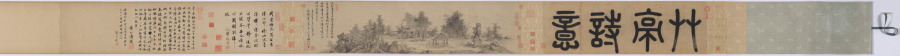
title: Poetic Feeling in a Thatched Pavilion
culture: China, Yuan dynasty (1271-1368)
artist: Wu Zhen (Chinese, 1280–1354)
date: 1347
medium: handscroll; ink on paper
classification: Painting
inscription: 依村構草亭，端方意匠宏。 林深禽鳥樂，塵遠竹松輕。 泉石俱延賞，琴書悅性情。 何當謝凡近，任適慰平生。 至正七年丁亥冬十月，為元澤戲作草亭詩意。梅沙彌書 [印]楳華盦; 嘉興吳鎮仲圭書畫記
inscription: 我愛梅花翁，巨老傳心印。 脩此水墨缘，種種得蒼潤。 樹石墮筆鋒，造化不能吝。 而今橡林下，我願執掃汛。 後學沈周 [印]启南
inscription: Colophon by Chen Rentao (1952): 予求梅道人畫二十年不可得。所見多膺鼎，即故宮所藏山水數軸都不可靠。傳世真迹，惟《漁父圖》、《嘉禾八景》與此《草亭詩意》而已。壬辰十月十四日余大病初愈，居家休養，研山師忽持此圖相贈。展卷披覽，頓覺精神沛振，如服僊藥。同日又得宋拓柳公權《神策軍紀聖德碑》，及群玉堂藏《真草書千(字)文》，皆海內孤本。一日得數寶，欣喜何如，書以志幸。 陳仁濤識 [印]陳氏仁濤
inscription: Colophon by Chen Rentao: 此圖作於至正七年丁亥，時年六十八，盖其晚年神品也。 濤又識 [印]陳仁濤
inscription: Title on frontispiece by Li Dongyang 李東陽 (1447-1516).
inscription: 33 additional seals: 1 seal of Li Chao-heng 李肇亨 (1592-1664)：檇李李肇亨書畫記; 9 seals of Liang Qingbiao 梁清標 (1620-1691): 蒼巖子、蕉林、蕉林梁氏書畫之印、蕉林秘玩、蕉林書屋、蕉林玉立氏圖書、棠邨 (appears twice)、棠邨審定; 1 seal of Wang Yirong (1845-1900): 懿榮; 3 seal of Li Yanshan (1898-1961): 雙銕笛樓 (appears twice)、硯山心賞; 12 seals of Chen Rentao 陳仁濤（1906-1968）：陳氏仁濤、陳仁濤珍藏印、金匱寶藏·陳氏仁濤 (appears three times)、金匱秘笈、金匱室、金匱室精鑒璽 (appears twice)、金匱室主、金匱神品、仁濤奇緣; 1 seal: 崐溟居士; 1 seal: 林止在㭯生圖書印; 3 seals unidentified.